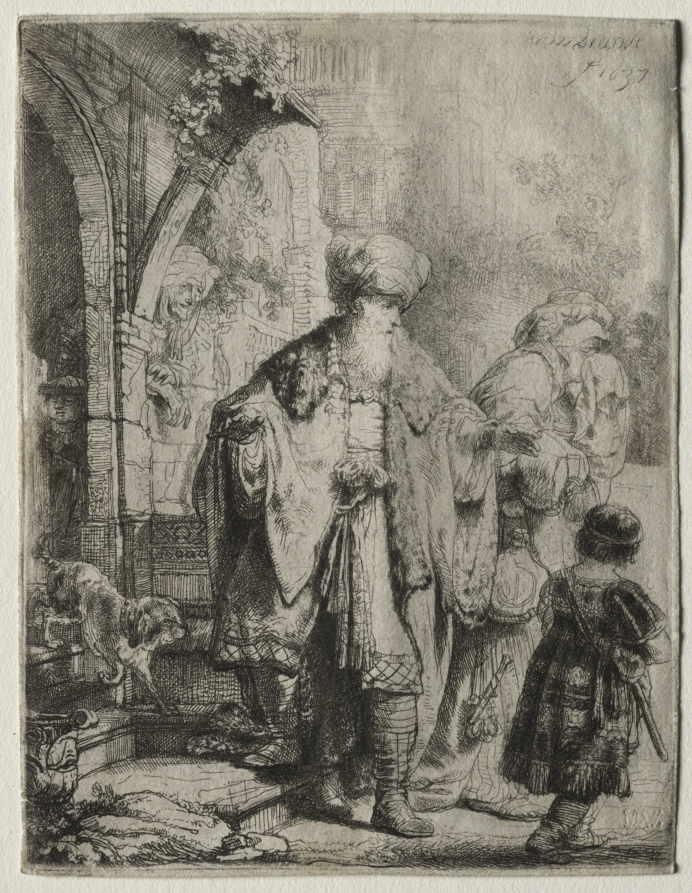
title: Abraham Casting out Hagar and Ishmael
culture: Netherlands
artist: Rembrandt van Rijn (Dutch, 1606–1669)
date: 1637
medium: etching and drypoint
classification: Print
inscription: upper right, in plate: Rembrandt / f 1637 ; VERSO, upper center, in pen and brown ink: 1419 ; center right, in graphite: [illegible] ; center right, in graphite: Z9 / 10 / 18 ; [r]are et t. belle Ep. ve [illegible] ; center left, in graphite: D. 31 ; lower left, in graphite: N 3 ; lower left, in graphite: a57955 ;lower center, in graphite: B 30 ; lower center, in graphite: 855 ; lower right, in graphite: d. 31 ; lower right, in graphite: B.30 ; lower right, in graphite: 91194